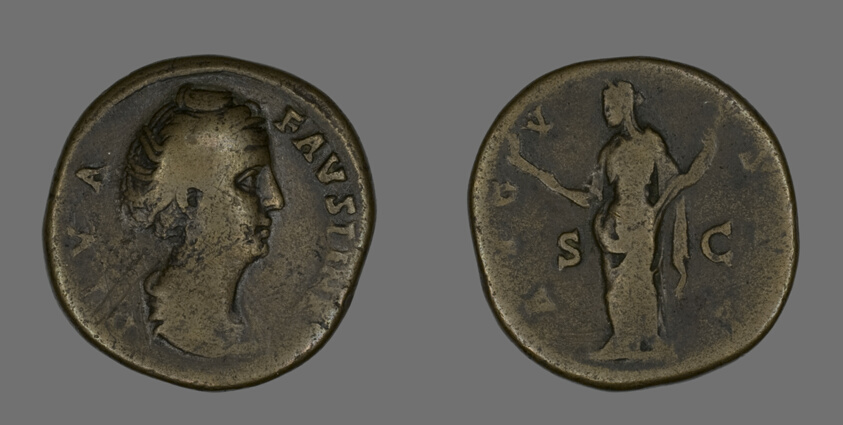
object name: Coin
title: Sestertius (Coin) Portraying Empress Faustina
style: roman (ancient, style or period)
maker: Roman, minted in Rome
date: 141 or later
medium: Bronze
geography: Roman Empire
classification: coin; ancient art